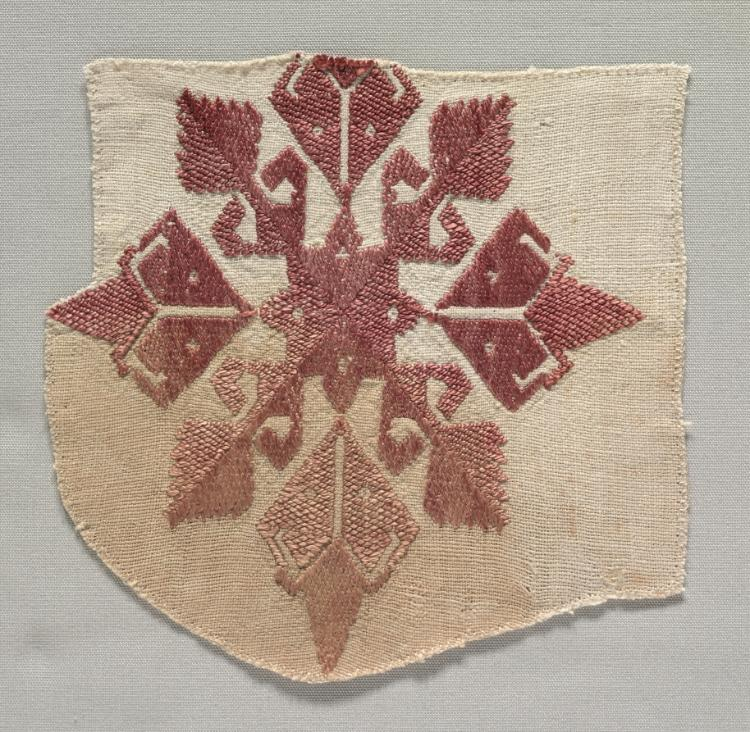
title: Fragment of Embroidery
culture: Greece, Cyclades Islands, Naxos, 18th century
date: 1700s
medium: embroidery: silk on linen tabby ground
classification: Embroidery